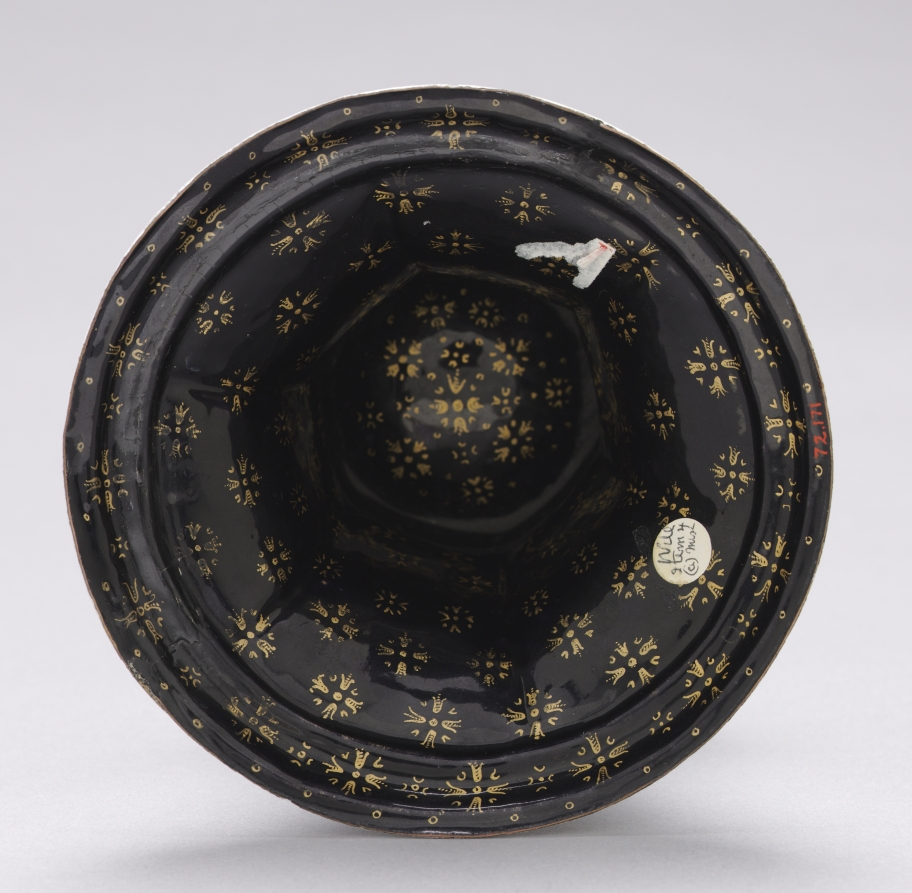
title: Salt Dish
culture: France, Limoges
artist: Jean Limousin (French, 1528–c. 1610)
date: early 1600s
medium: painted enamel on copper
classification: Ceramic